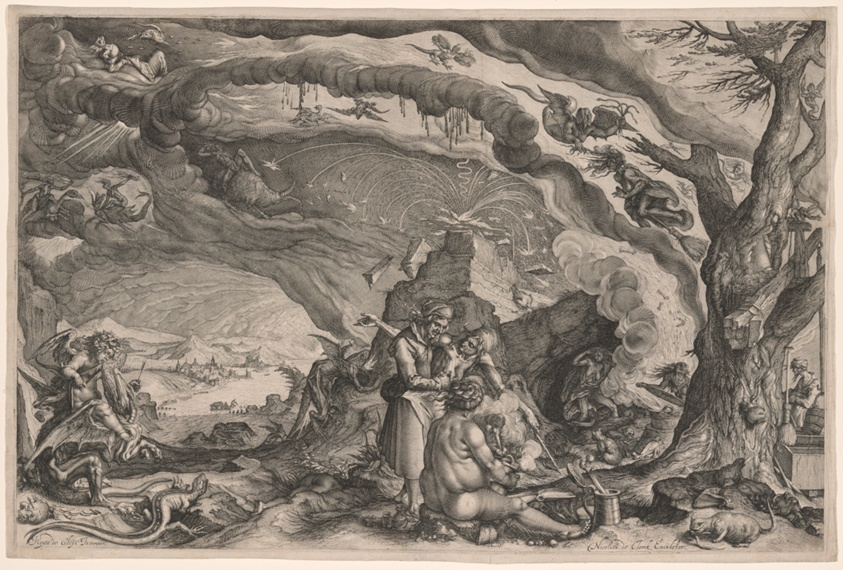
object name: Print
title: Witches Preparing for Sabbath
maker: Attributed to Andries Stock (Netherlandish, 1572/82-after 1648); after Jacques de Gheyn II (Dutch, 1565–1629)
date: c. 1610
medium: Engraving on ivory laid paper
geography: Netherlands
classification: engraving; paper; print; prints and drawing